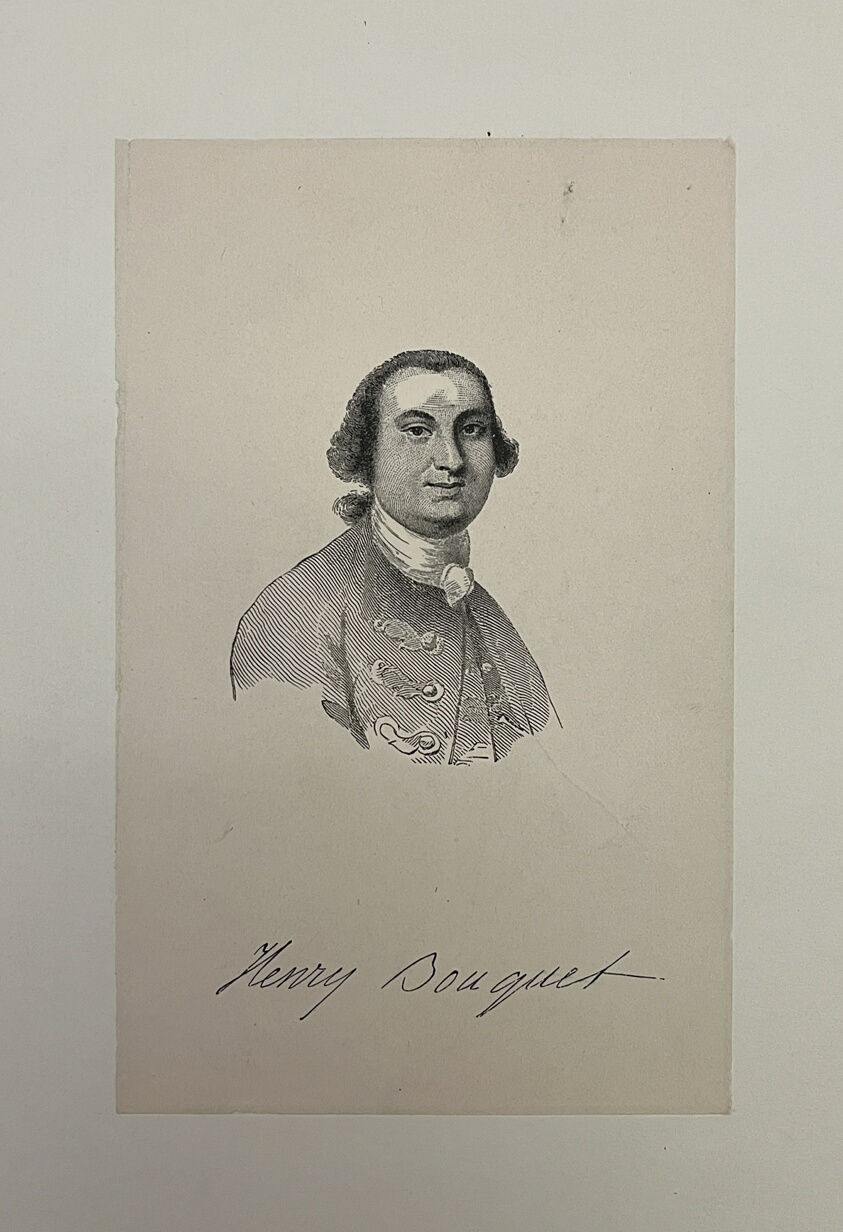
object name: Print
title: Henry Bouguet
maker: Artist Unknown (Likely American or British, 19th century)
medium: Etching on paper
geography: United States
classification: reproduction; print; prints and drawing